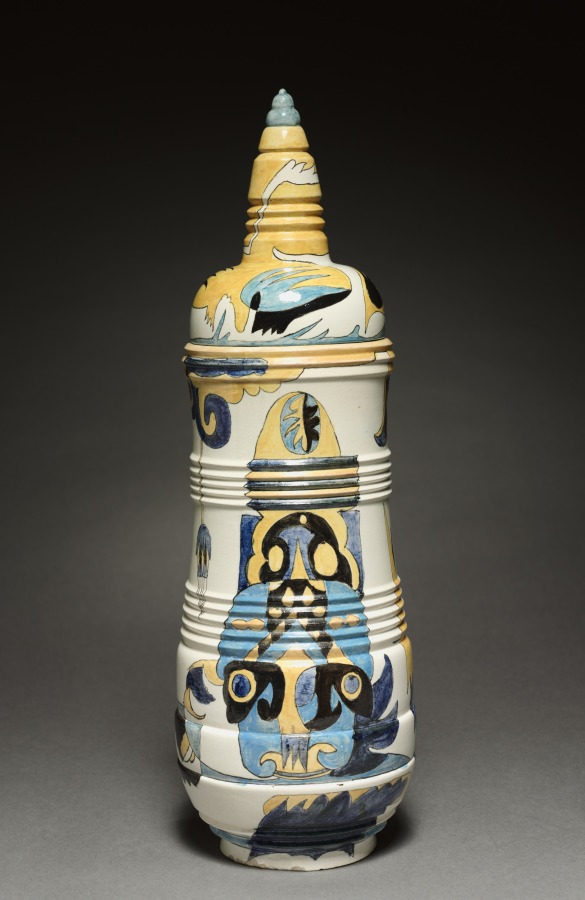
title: Covered Jar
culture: Netherlands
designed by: Theodorus A. C. Colenbrander (Dutch, 1841–1930)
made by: Rozenburg Factory (Netherlandish)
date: 1885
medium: earthenware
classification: Ceramic